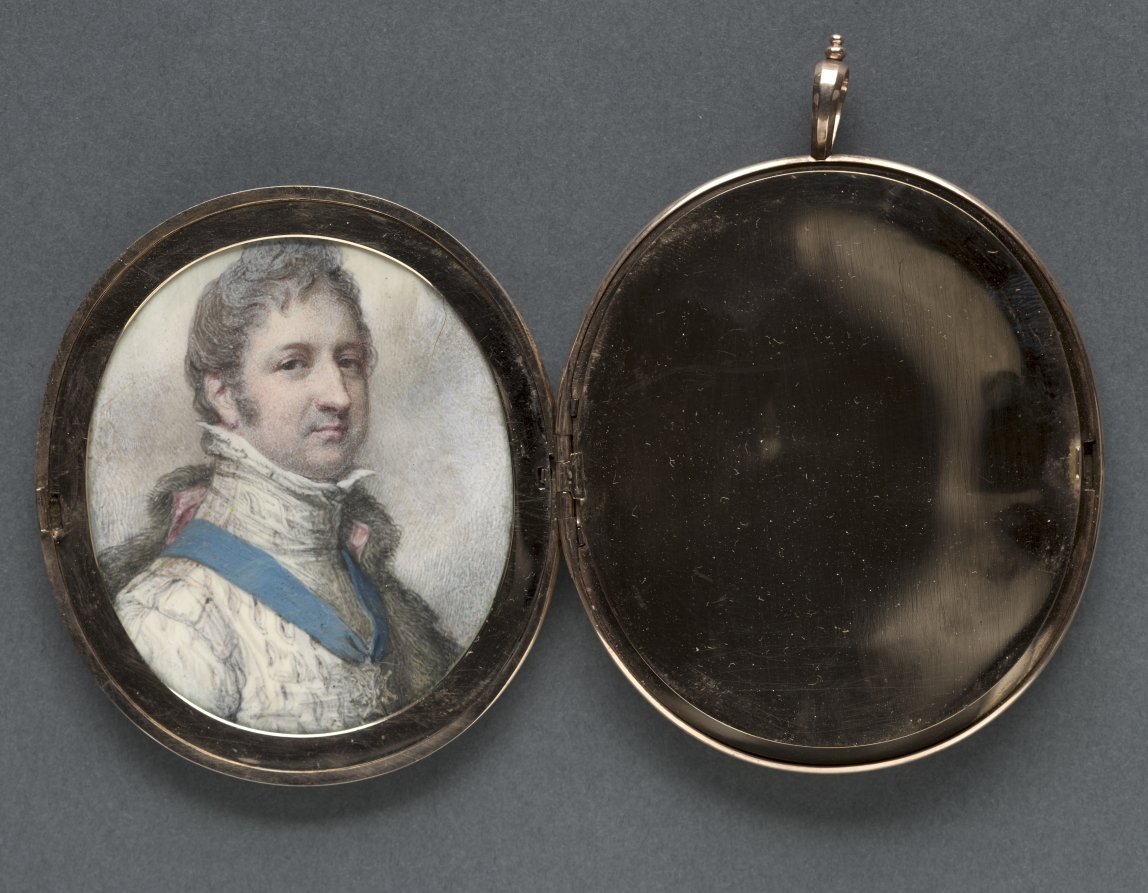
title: Portrait of Louis-Philippe, Duke of Orléans, later King of the French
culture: England, early 19th Century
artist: Richard Cosway (British, 1742–1821)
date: 1804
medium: watercolor on ivory in a gold locket frame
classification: Portrait Miniature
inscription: signed on backing: Rdus Cosway / R.A. et F.S.A. / Primarius Pictor / Serenissimi Walliae / Principie / Pinxit / 1804.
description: Louis-Philippe (1773–1850, king of the French 1830–48) was the son of Louis-Philippe Joseph, duc d’Orléans, who was known as Philippe-Egalité during the French Revolution. The Orléans family was a branch of the House of Bourbon. This work was painted while Louis-Philippe was in exile and living in England from 1800 until 1815, when Napoleon abdicated. He finally succeeded Charles X as king of France in 1830. During the February Revolution of 1848, Louis-Philippe was again forced into exile in England where he died two years later. Richard Cosway had painted Louis-Philippe (as well as his siblings and father) when the family was in England immediately following the outbreak of revolution in 1789. Louis-Philippe would have been thirty-one years old when this work was executed. He wears the Order of the Holy Spirit, a chivalric order of the French monarchy, which can be distinguished by its white dove surrounded by green flames at the center of a Maltese cross, with fleur-de-lis between the arms of the cross. Instead of the brilliant turquoise and white cloud background traditionally associated with Cosway, this miniature has the more restrained, gray, hatched background that characterizes the artist’s later works. The surface of the work is much marred by an irreversible crystallization of the paint layer that further emphasizes the gray tones throughout. The form of the unmarked case is typically English, but the motif is French, which may indicate a French goldsmith imitating the English style. The motif resembles a swan composed of foliate scrolls. A lock of plaited brown hair is also enclosed under glass within the locket, facing the miniature.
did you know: Without DNA analysis it is impossible to know to whom the hair belonged, though the most likely candidate is Louis-Philippe himself.